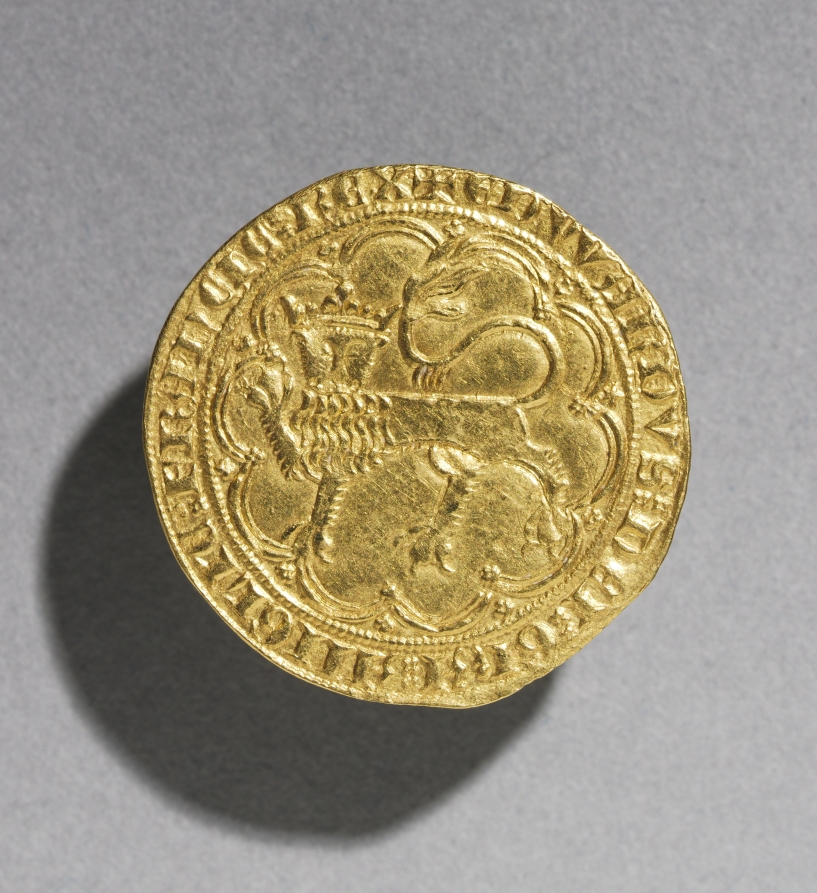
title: Leopard d'Or of Edward III of England (obverse)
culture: England, Anglo-Gallic, Gothic period, 14th century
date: 1327–1377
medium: gold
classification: Coins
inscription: crowned leopard passant left framed in double arches and inscription: EDVVARDVS:DEI:GRA:ANGLI:FRANCIE:REX.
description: Known as a "Golden Leopard" because of the crowned leopard on one side, this gold coin was minted for Edward III, king of England and France.